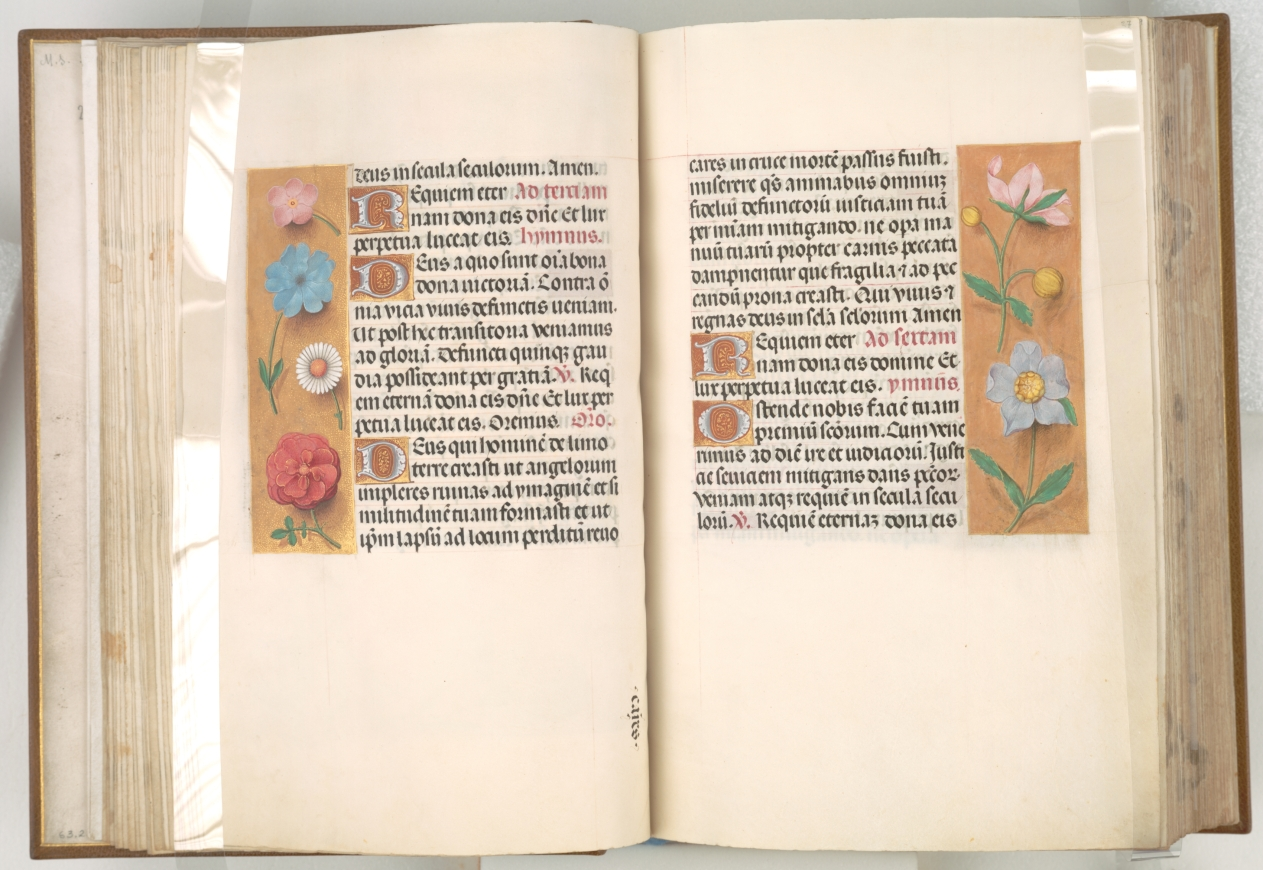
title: Hours of Queen Isabella the Catholic, Queen of Spain: Fol. 26v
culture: Flanders, Ghent and Bruges, late 15th century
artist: Master of the First Prayerbook of Maximillian (Flemish, c. 1444–1519)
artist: and Associates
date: c. 1500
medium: ink, tempera, and gold on vellum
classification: Bound Volume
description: A great lover of Flemish art, Queen Isabella treasured her many devotional books. This deluxe manuscript was created for her private devotions by highly organized and distinctly talented manuscript painters active in Ghent and Bruges. The Ghent-Bruges school represents the culmination of Flemish book painting, whose main features were the use of rich colors, illusionistic effects, a love of landscape, and a strong sense of visual narrative. Manuscripts produced by this circle of artists are renowned for their border decoration featuring a rich variety of realistically painted flowers, scrolling acanthus leaves, birds, and butterflies.